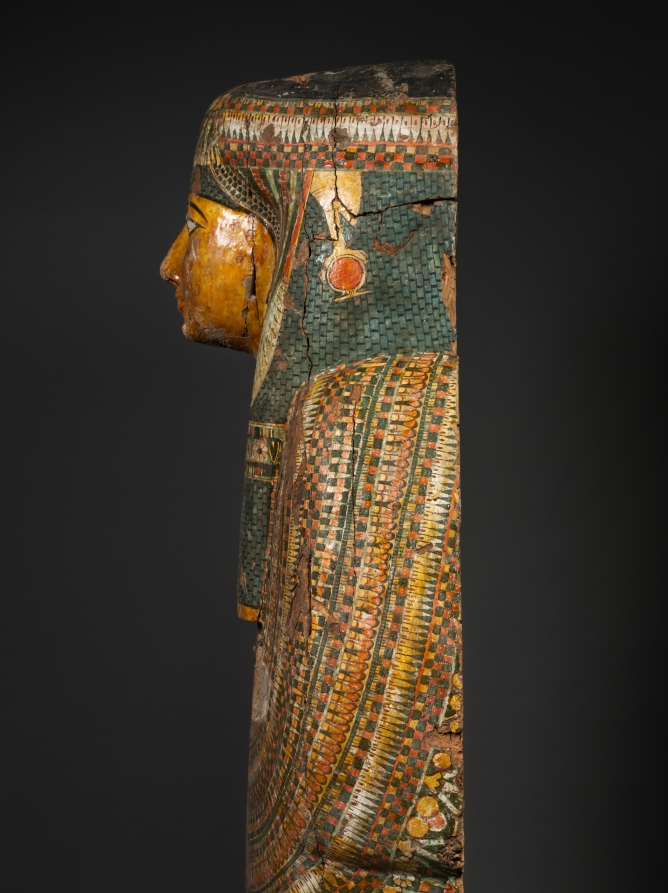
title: Coffin of Nesykhonsu (lid)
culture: Egypt, Third Intermediate (1069–715 BCE), Dynasties 21–22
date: c. 976–889 BCE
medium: gessoed and painted sycamore fig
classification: Funerary Equipment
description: A complete set of coffins during the late New Kingdom and Third Intermediate Period consisted of an outer and inner coffin and a mummy board (essentially a lid without a case, placed directly over the wrapped mummy). Judging by its size, this must have been Nesykhonsu's outer coffin. The type is essentially the same as the coffin of Bakenmut, which was also an outer coffin. The two coffins are said to have been found together and to have belonged to a man and wife. This is quite possible, although the inscriptions do not bear it out. Bakenmut is not mentioned on Nesykhonsu's coffin, nor is she mentioned on his. There was by this time a tremendous repertoire of scenes appropriate for coffin decoration. Whereas Bakenmut's coffin features images of deified dead pharaohs, Nesykhonsu's is decorated in a more personal way with scenes from her own funeral. The main scene in the interior (near the top) shows a priest clad in a panther skin with the mummy of Nesykhonsu behind. The god appears in mummy form and wears a sun disk on his head. The scarab beetle inside the sun disk identifies him as Khepri, the morning sun, and the hieroglyphs to the right identify him as Atum, the evening sun. Taken together, image and text represent the sun god in both his rising and setting, youthful and aged aspects.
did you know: Two of Nesykhonsu's titles, "Lady of the House" and "Singer of the Choir of Mut the Great," are written on the outside of the coffin.